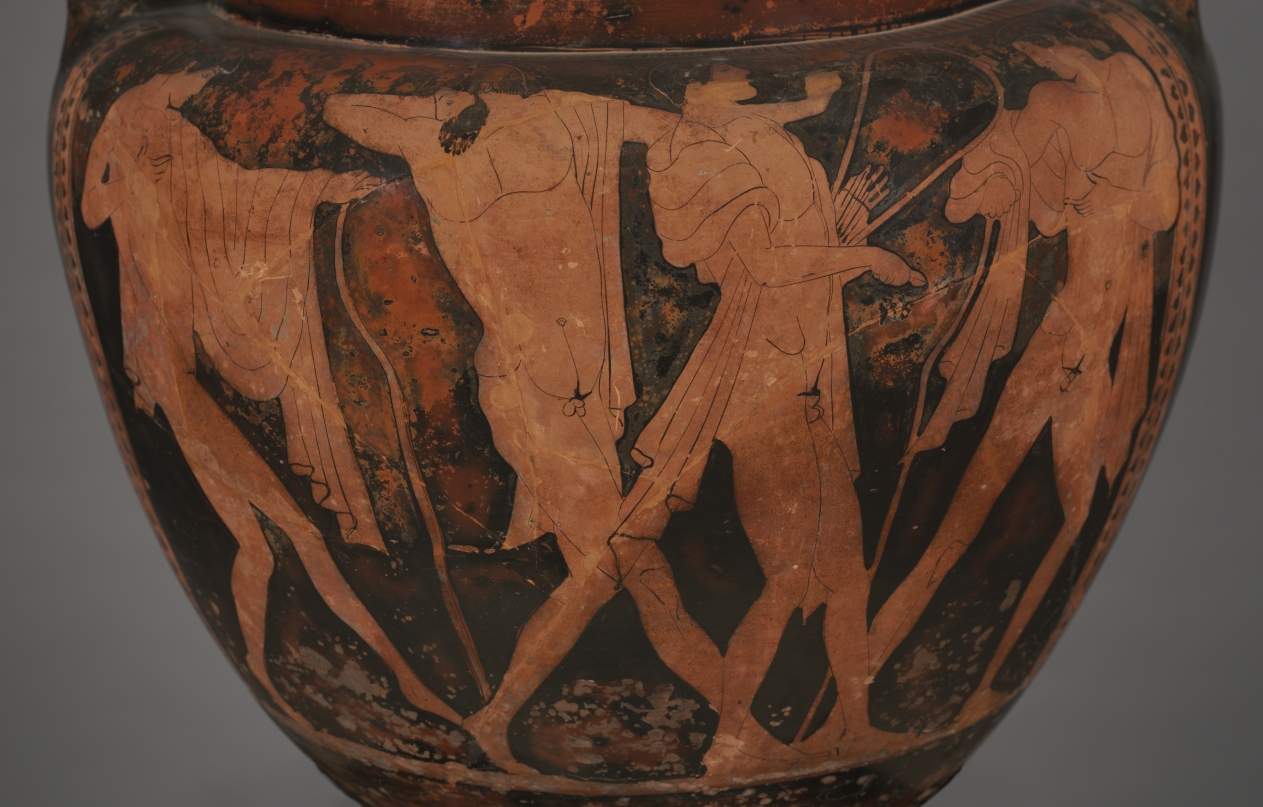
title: Red-Figure Column Krater (Mixing Vessel): Apollo and Goddesses with Chariot (A); Komos (Revel) (B)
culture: Greek, Attic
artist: attributed to Cleveland Painter (name vase; Greek, Attic, active c. 470–460 BCE)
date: c. 470–460 BCE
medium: ceramic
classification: Ceramic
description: Since this column-krater is the most important of 12 vases painted by a Greek artist whose name is unknown, the great English vase expert, Sir John D. Beazley, named him (or her) the Cleveland Painter, after our city. Other vases by the Cleveland Painter are now in New York, Vienna, Paris, and Copenhagen, as well as museums in Greece and Italy. The chariot scene on the main side of the vessel is a divine one, as indicated by the presence of Apollo, identified by his lyre and laurel wreath. With him are three goddesses, probably his sister Artemis (facing him), together with Hera (wearing a crown and holding a scepter and libation dish), and Hebe, the daughter of Zeus and Hera, on her way to meet her future husband, Herakles.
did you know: The revelers on this vessel dance to the music of the barbiton, a stringed instrument associated with leisure and luxury.